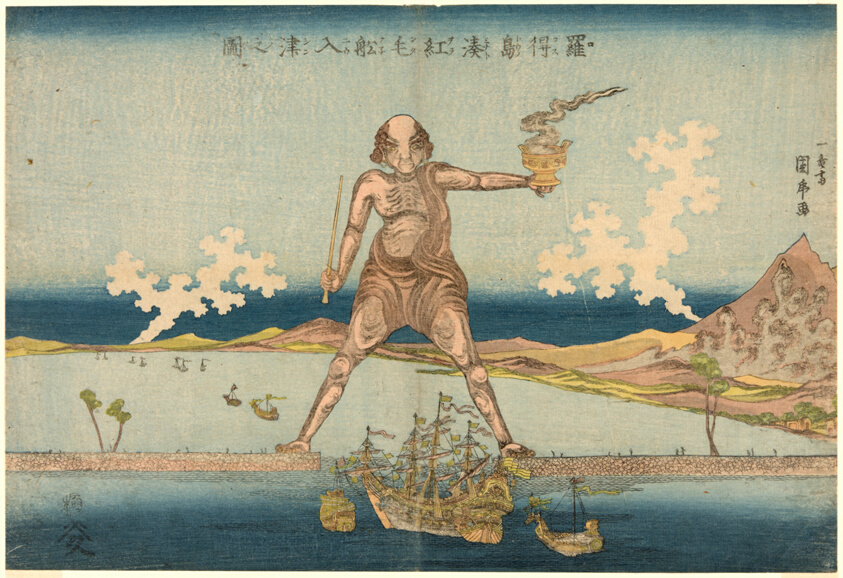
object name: Print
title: Dutch Ships Entering the Port of the Island of Rhodes (Rokosuto minato Oranda fune nyushin no zu)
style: Japanese (culture or style)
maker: Utagawa Kunitora (Japanese, active c. 1804-44)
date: c. 1818/30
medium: Color woodblock print; oban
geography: Japan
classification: woodblock print; print; asian art